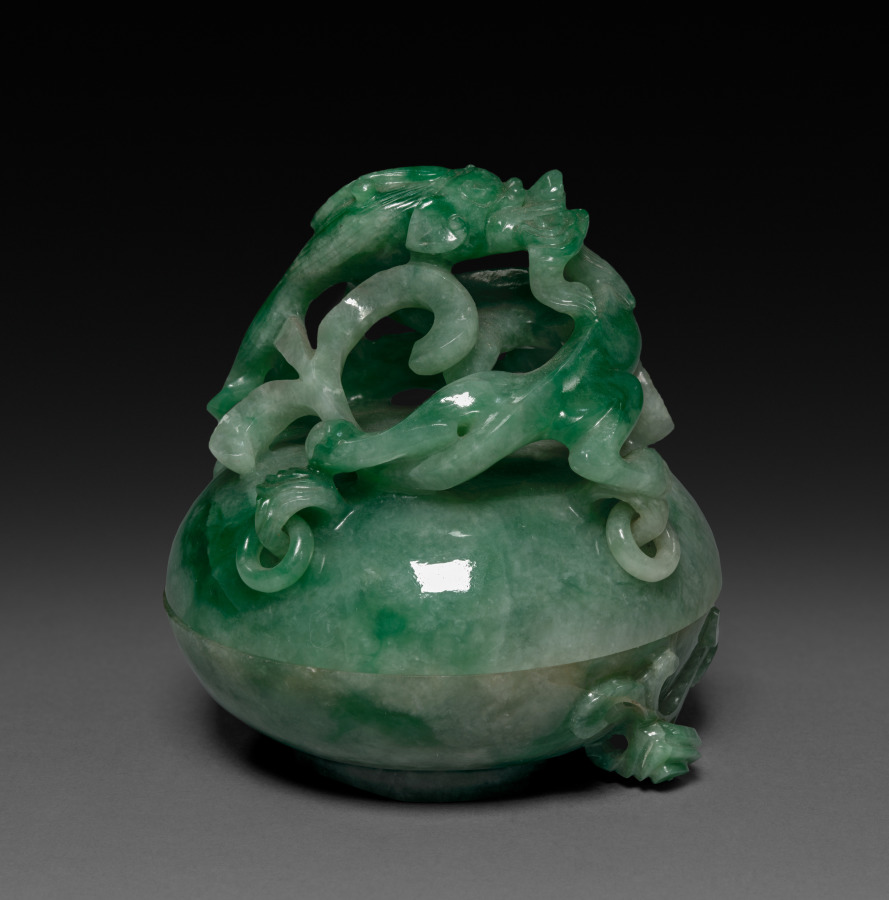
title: Three-Sectional Altar Group: Small Bowl with Carved Dragon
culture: China, Qing dynasty (1644-1911)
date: 1644–1911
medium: jade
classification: Jade